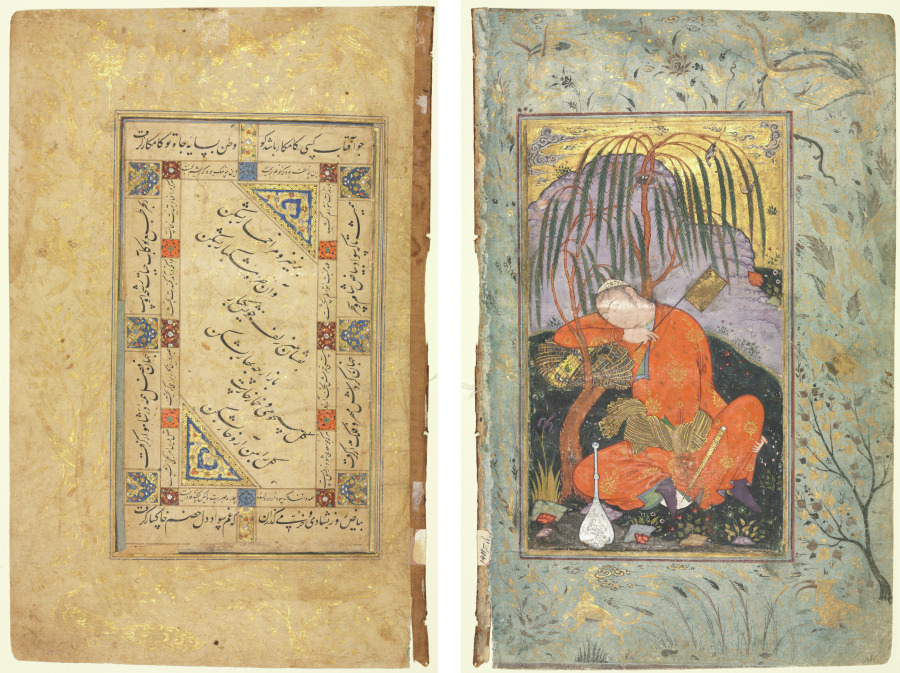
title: Persian Couplets (recto); Sleeping Youth (verso)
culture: Iran, Isfahan, Safavid period (1501-1722)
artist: style of Riza-yi Abbasi (Iranian)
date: late 1500s–early 1600s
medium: ink, gold, and opaque watercolor on paper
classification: Manuscript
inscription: script: Nasta'liq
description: Under Shah Abbas, the tradition in which painting was employed to illustrate a literary work was all but abandoned. In its place came a new concern with single-page illustrations, such as this one, which have no specific content or meaning. They often illustrate albums of collections of verses about love and beauty, in which these themes often appear to serve as allegories of things divine.